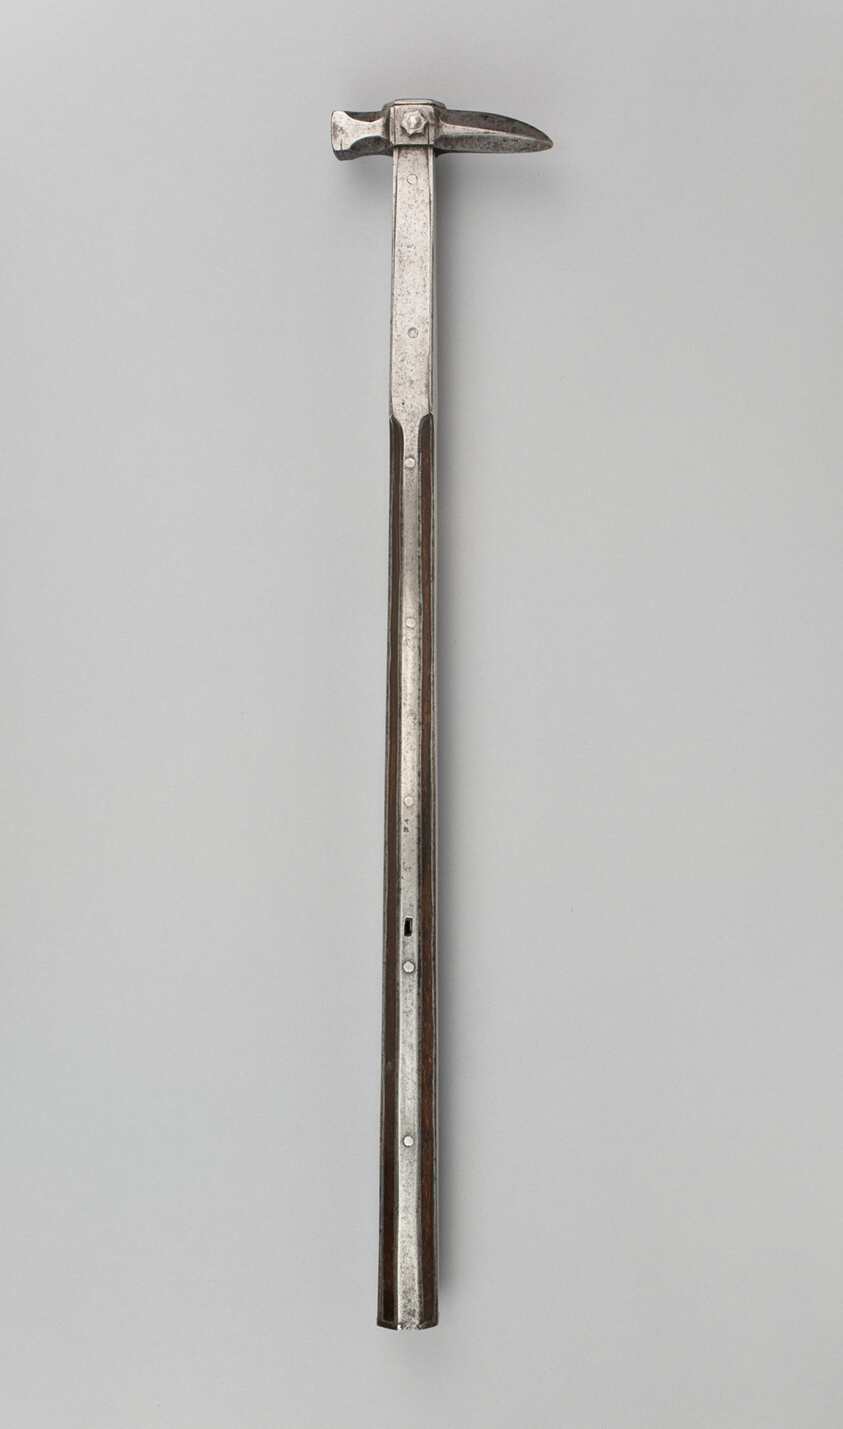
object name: Arms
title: War Hammer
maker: German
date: 1500/30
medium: Steel and wood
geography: Germany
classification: shafted weapon; arms; arms and armor